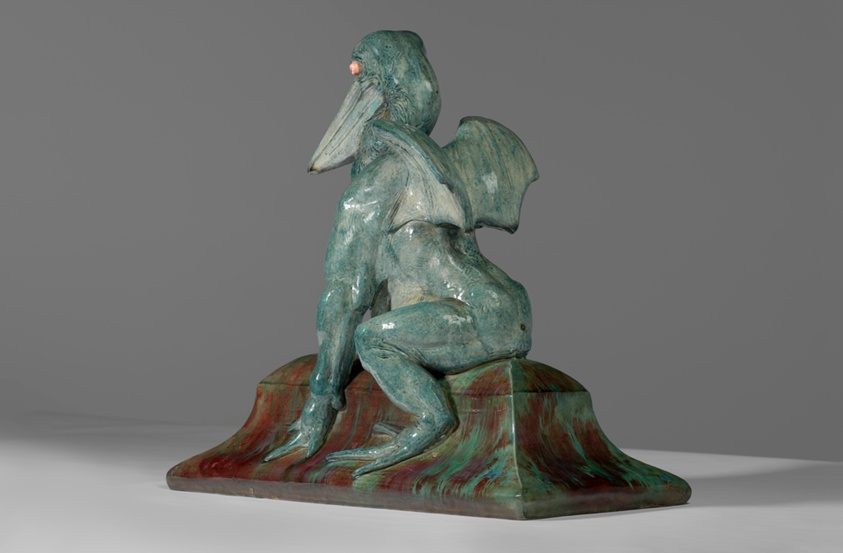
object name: Ceramics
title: Pelican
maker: Emmanuel Fremiet, French, 1824–1910; Made by Émile Muller et Cie, Ivry-sur-Seine, France, 1854–1908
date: c. 1896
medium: Glazed stoneware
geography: France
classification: sculpture; ceramics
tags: mythological figures, animals, bird, pelican, wings